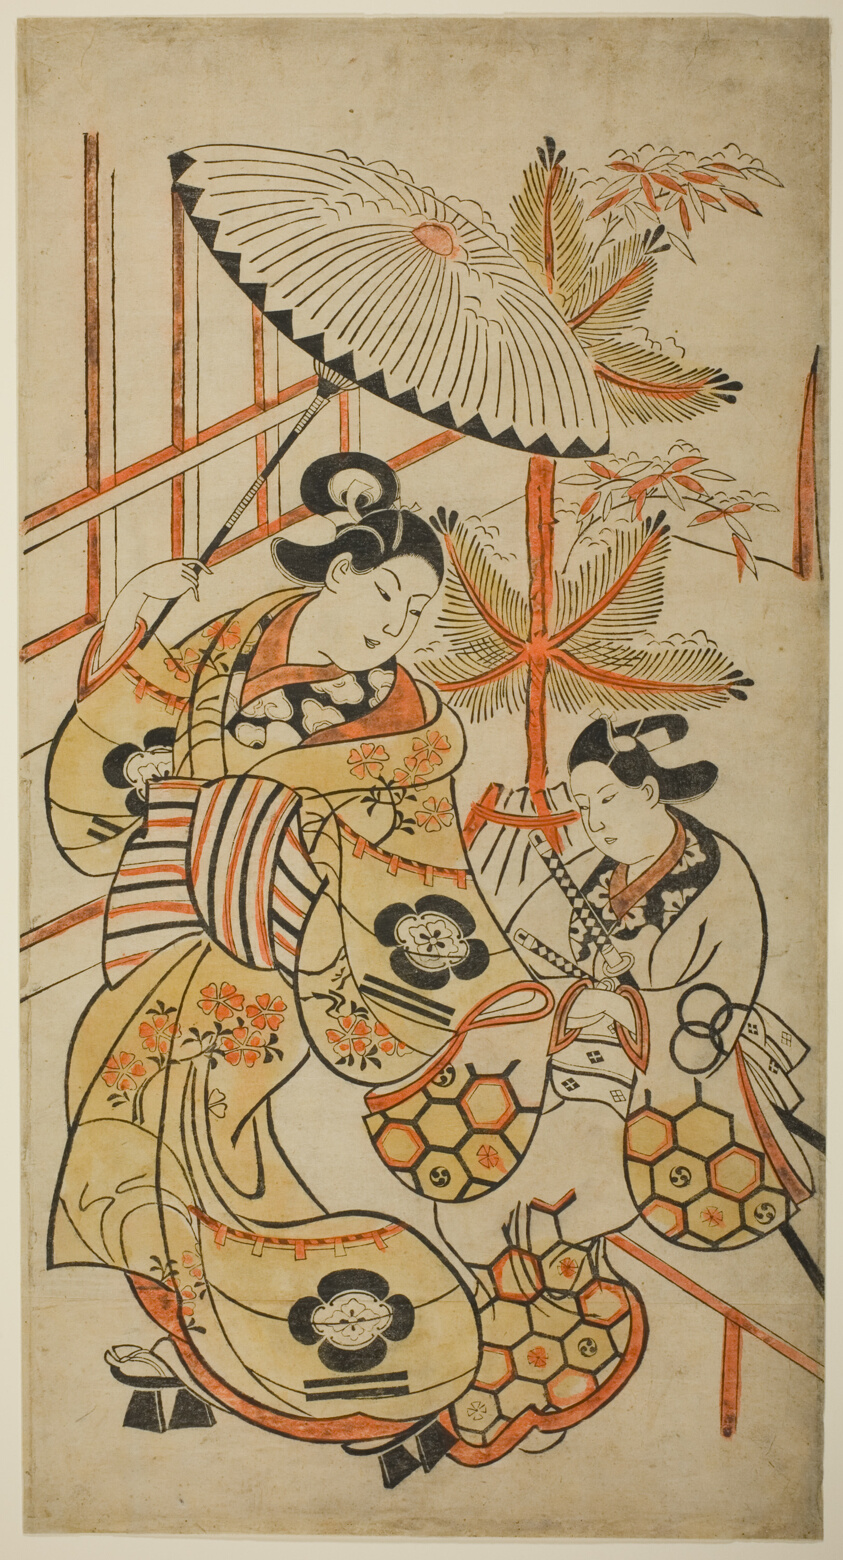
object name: Print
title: The Actors Matsumoto Hyozo as a courtesan and Nakagawa Hanzaburo as a young man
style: Japanese (culture or style)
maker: Attributed to Torii Kiyonobu I; Japanese, 1664-1729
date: c. 1700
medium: Hand-colored woodblock print; o-oban, tan-e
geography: Japan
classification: woodblock print; print; asian art